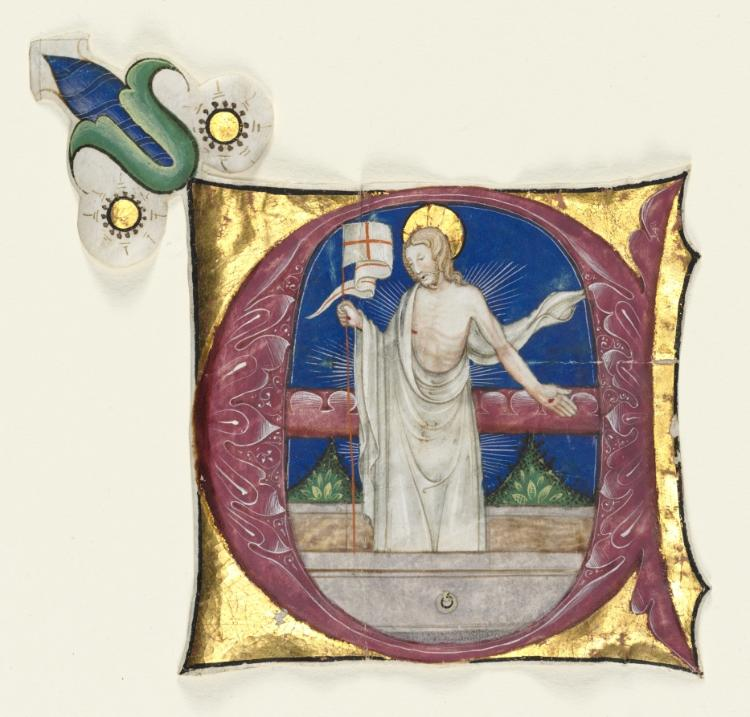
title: Historiated Initial (E) Excised from an Antiphonary: Risen Christ in the Tomb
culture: Italy, Milan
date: c. 1420–50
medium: ink, tempera, and gold on parchment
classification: Manuscript